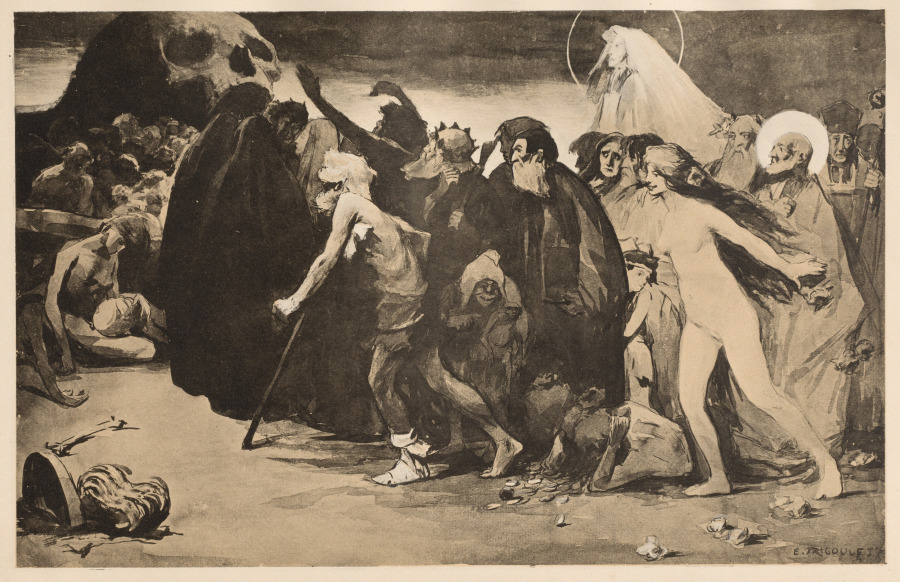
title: Le Chemin de la Mort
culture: France, Paris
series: L'Estampe Moderne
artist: Eugène Trigoulet (French, 1867–1910)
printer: Imprimerie Champenois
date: 1899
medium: Color lithograph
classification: Bound Volume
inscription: In plate: lower right corner of image: E. TRIGOULET; upper right corner: blindstamp of l'Estampe Moderne (Lugt 2790)